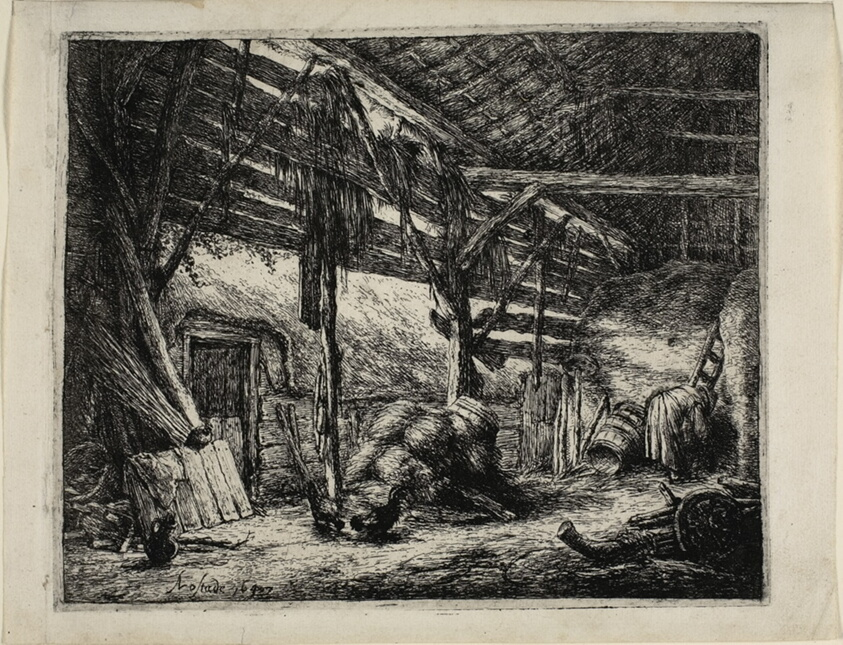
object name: Print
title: The Barn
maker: Adriaen van Ostade (Dutch, 1610-1685)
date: 1647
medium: Etching in black on ivory laid paper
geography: Holland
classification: etching; print; prints and drawing